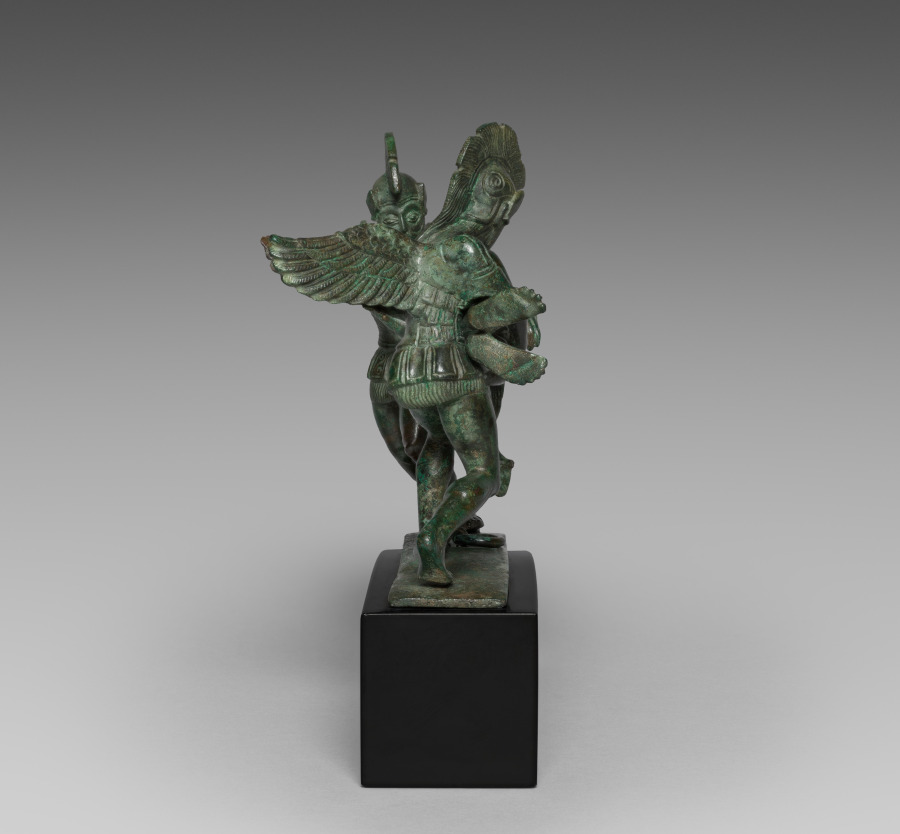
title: Sleep and Death Cista Handle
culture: Etruscan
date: 400–375 BCE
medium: bronze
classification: Sculpture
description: Designed for attachment to the lid of a large bronze cista, a cylindrical lidded box, these three figures probably represent Sleep (Hypnos) and Death (Thanatos) holding the body of Sarpedon. A son of Zeus who helped to defend Troy from invading Greek forces, "godlike Sarpedon of the brazen helmet" fell at the hands of Patroclus, as told by Homer in Book XVI of the Iliad. Apollo then intervened to protect the body, removing it from danger and entrusting it to the two winged deities, as depicted here and in a number of other ancient artworks, Greek and Etruscan alike. If not Sarpedon, the fallen warrior could be Memnon, the son of Eos and Tithonos slain by Achilles.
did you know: These three figures were cast in eight separate pieces, then welded together and attached to the rectangular base.